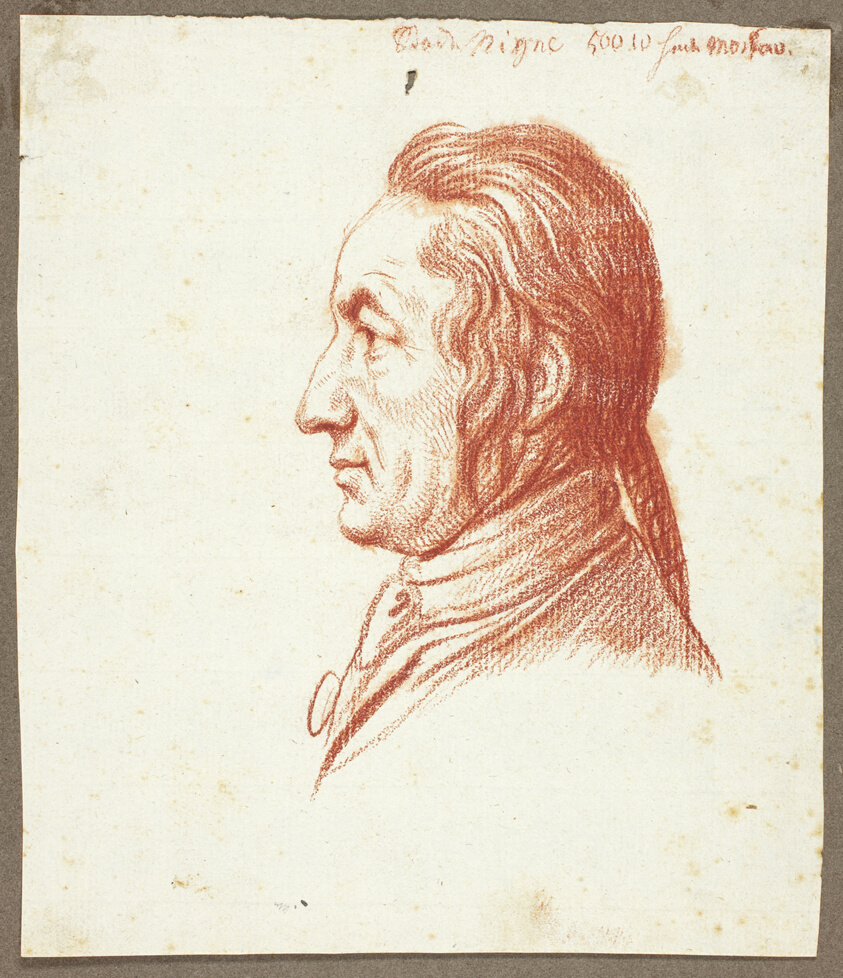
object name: Drawing and Watercolor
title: Portrait Head of a Man in Profile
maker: Daniel Nikolaus Chodowiecki (German, 1726-1801)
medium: Red chalk on ivory laid paper, tipped onto gray card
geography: Germany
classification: chalk; drawings (visual works); prints and drawing